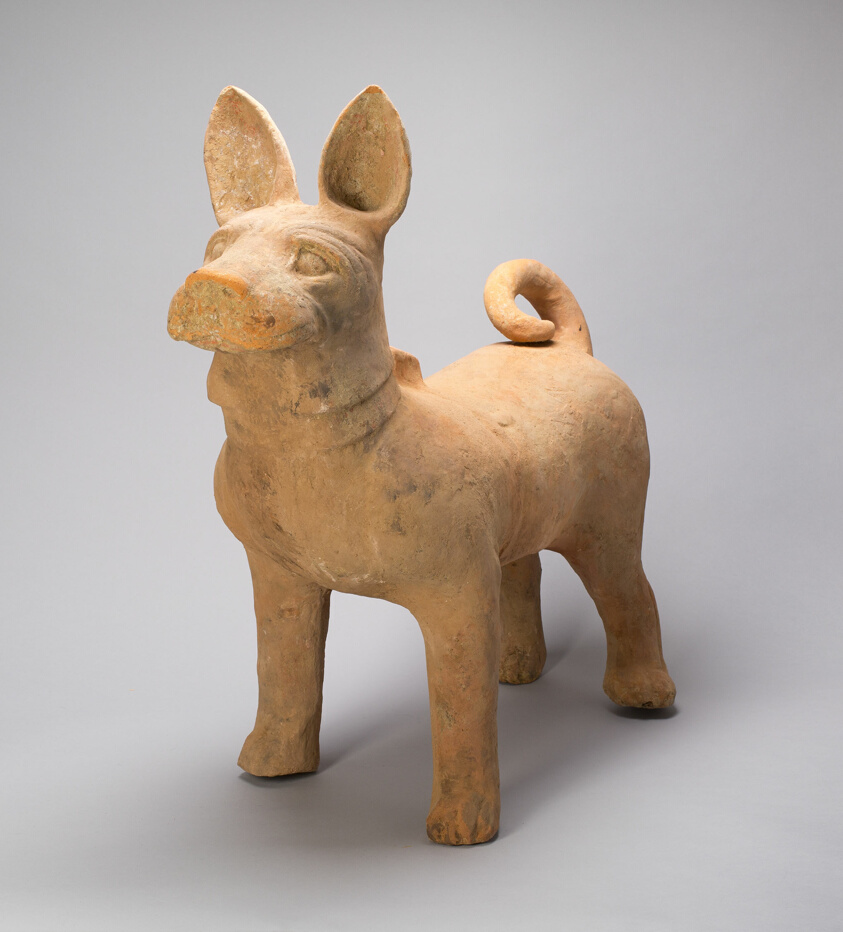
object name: Sculpture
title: Dog (Tomb Figurine)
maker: China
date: Western Han dynasty, 2nd/1st century B.C.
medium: Earthenware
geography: China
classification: earthenware; ceramics; asian art